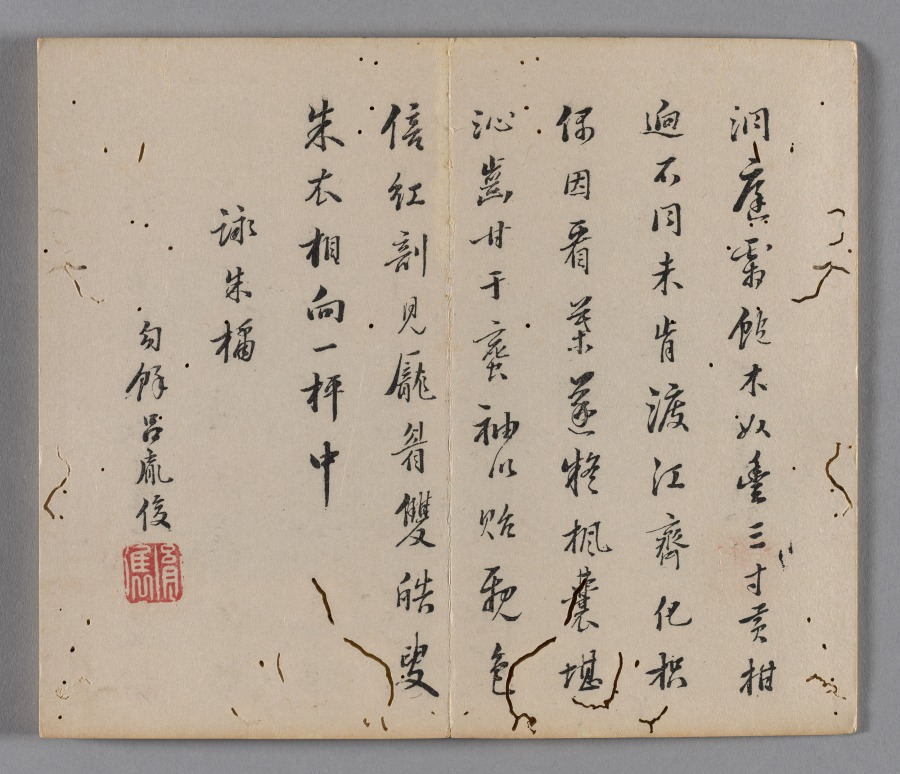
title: Ten Bamboo Studio Painting and Calligraphy Handbook (Shizhuzhai shuhua pu): Fruit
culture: China, Qing dynasty (1644-1911)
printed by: Hu Zhengyan (Chinese, c. 1584–1674)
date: 1633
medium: Woodblock-printed book; ink and colors on paper; first edition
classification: Print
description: Color printing reached a level of perfection in the early 1600s, as seen in this Ten Bamboo Studio Collection of Calligraphy and Painting and the Mustard Seed Garden Manual of Painting (printed 1679 and 1701). The painterly quality, precision in registering (aligning) the woodblocks, and harmonious colors made them the most successful color print editions in Chinese history. Both editions were printed and compiled in Nanjing, spread nationwide, and had a great impact on the arts in Japan and Korea.